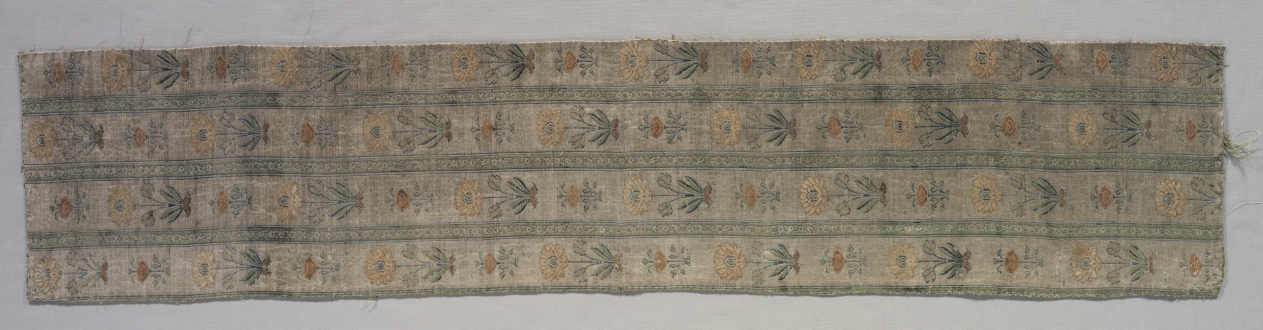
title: Surround for Turkish Silk Cushion Cover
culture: Iran, Safavid period (1501–1722)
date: early 1600s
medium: Silk, silver-metal thread: plain weave with inner warps and with continuous and discontinuous supplementary wefts bound in plain and 1/3 Z twill order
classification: Textile